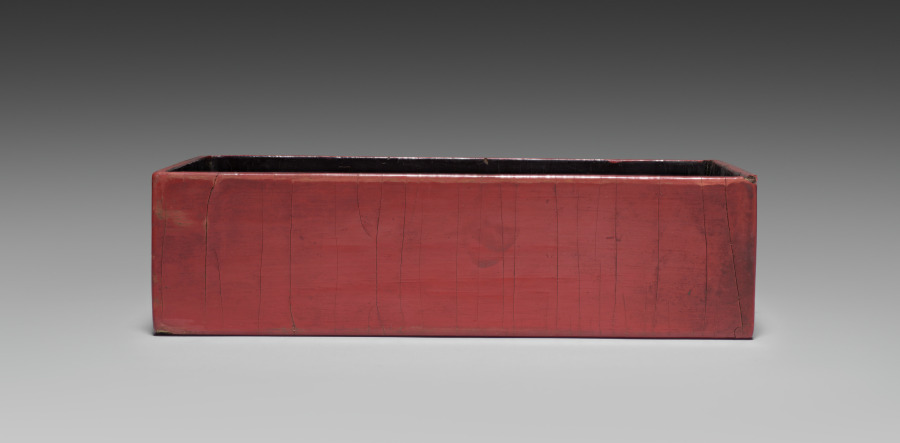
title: Drawer for a Tihong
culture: China, Ming dynasty (1368-1644), Wanli reign (1572-1620)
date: 1585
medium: carved cinnabar lacquer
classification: Lacquer